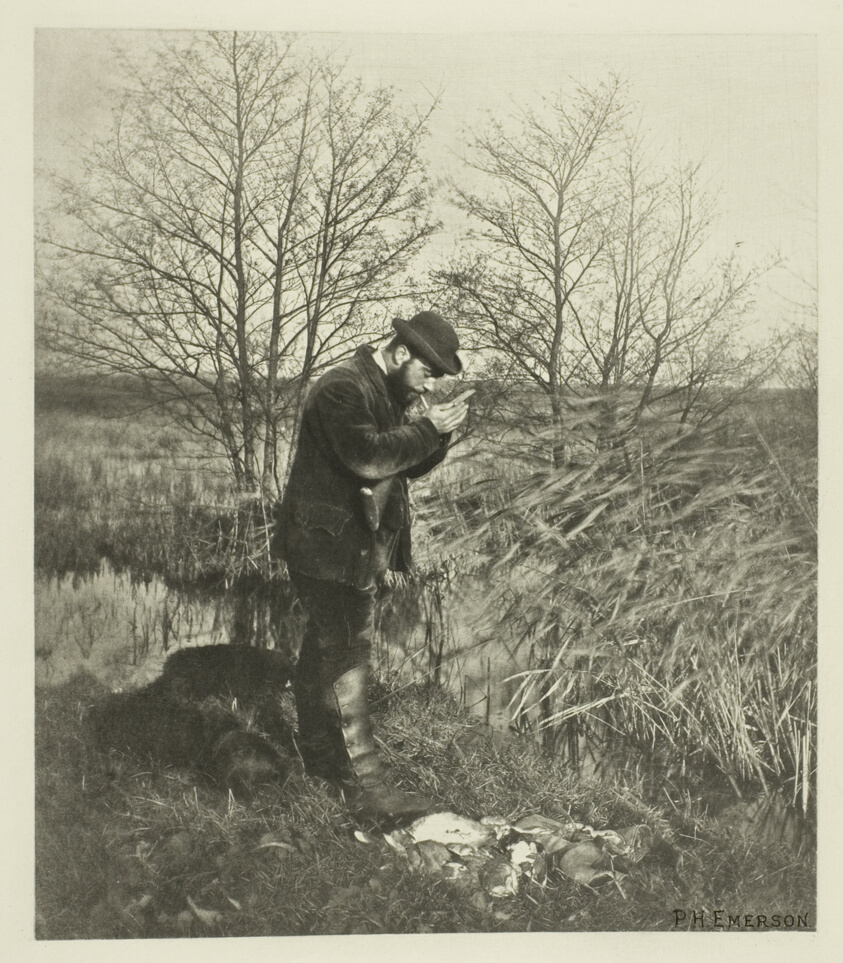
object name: Photograph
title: At the Covert Corner (Norfolk)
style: 19th century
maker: Peter Henry Emerson (English, born Cuba, 1856–1936)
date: c. 1883/87, printed 1888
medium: Photogravure, pl. XI from the album "Pictures of East Anglian Life" (1888)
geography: England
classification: photogravure; photomechanical process; photography; photograph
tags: Collected by Hugh Edwards, Pictures of East Anglian Life, Seat of War in the Crimea